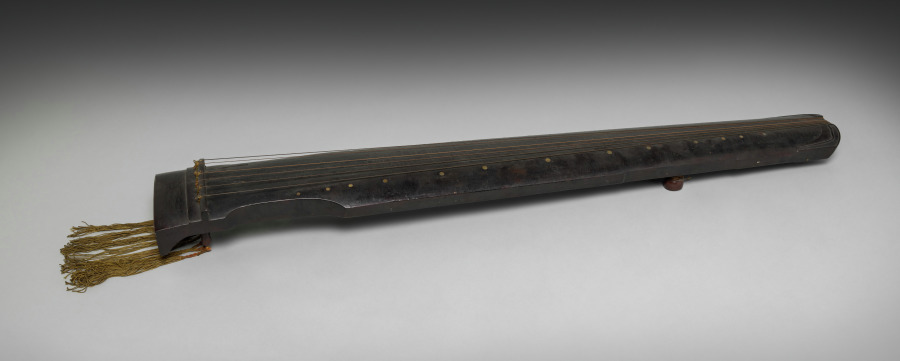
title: Guqin made by Zhang Ruixiu of Suzhou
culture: China, Ming dynasty (1368–1644)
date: 1584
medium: Seven-string Asian long zither, chordophone, made from wood, lacquer, mother of pearl, and silk strings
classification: Musical Instrument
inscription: 為海虞天池先生重斲/ 萬曆甲申古吳張睿脩得古桐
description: China’s most prestigious instrument, the guqin can be traced to the Chu culture almost 2500 years ago. By the late Ming dynasty, Jiangnan was a center of high-end guqin production. Coated in black lacquer, this elegantly crafted instrument is inscribed on the inside, stating it was made by Zhang Ruixiu of Suzhou for Mr. Tianchi of Haiyu, also known as Yan Cheng (1547–1625). Yan was a key figure in guqin music history and founder of the Yushan school in Suzhou. Zhang Ruixiu was a guqin maker, known for achieving a supreme tone quality. Ten instruments attributed to him are known, of which this guqin has the earliest date.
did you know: The 13 studs in mother-of-pearl inlay indicate finger positions for sounding harmonics.